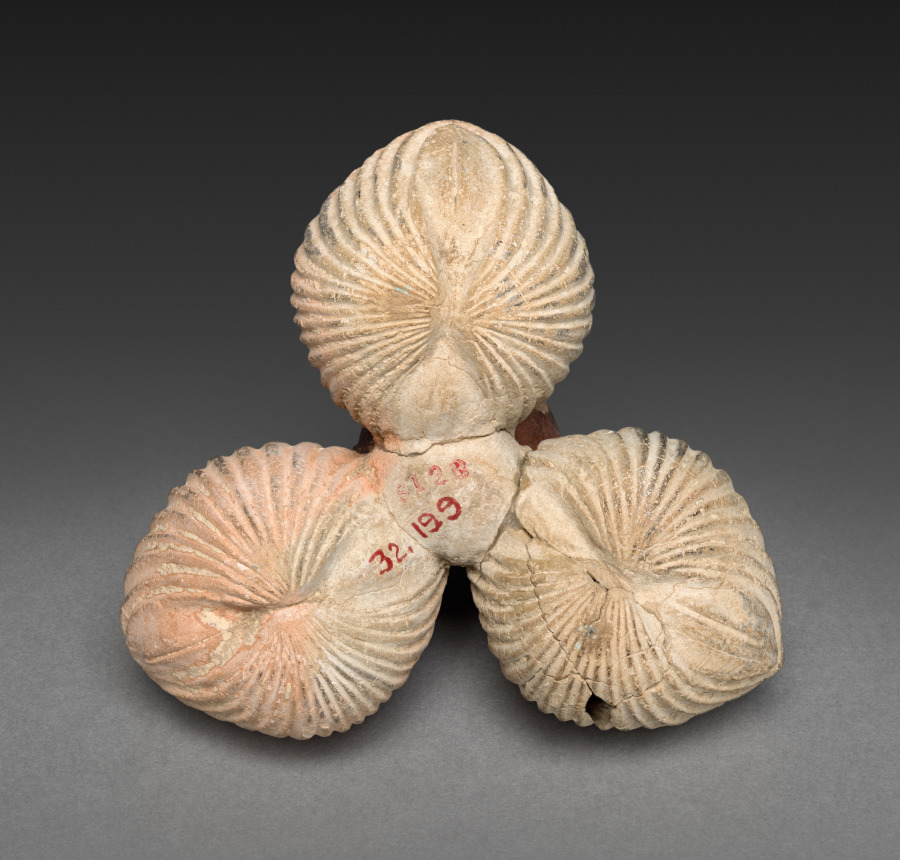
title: Cockleshell Aryballos (Oil Vessel)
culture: Greek, Attic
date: late 500s–early 400s BCE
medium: ceramic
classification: Ceramic